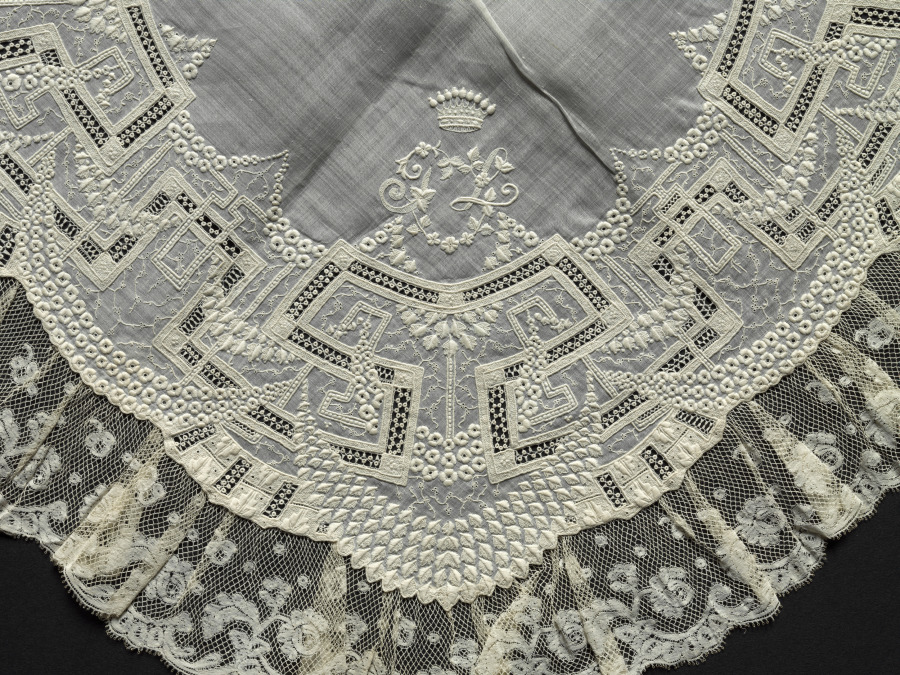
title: Lace Handkerchief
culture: Switzerland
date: 1700s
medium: linen: embroidery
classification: Embroidery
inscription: beneath a nine-point coronet in one corner: "P.L."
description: This handkerchief has an embroidered monogram in one corner: the initials P. L. beneath a nine-point coronet.